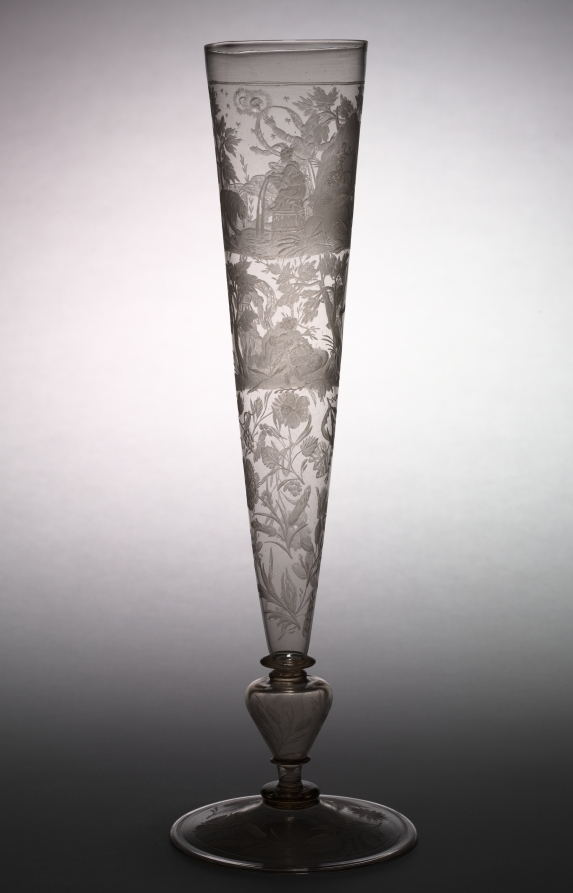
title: Flute Glass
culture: Germany, Thuringia, early 17th century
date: early 1600s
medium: glass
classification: Glass